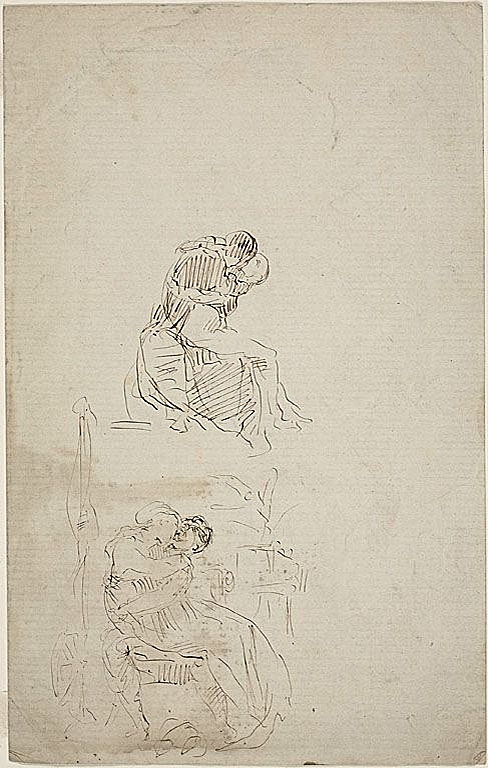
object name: Drawing and Watercolor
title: Two Seated Embracing Couples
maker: Jean Baptiste Carpeaux (French, 1827-1875)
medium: Pen and brown ink on ivory laid paper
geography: France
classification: pen and ink drawings; drawings (visual works); prints and drawing